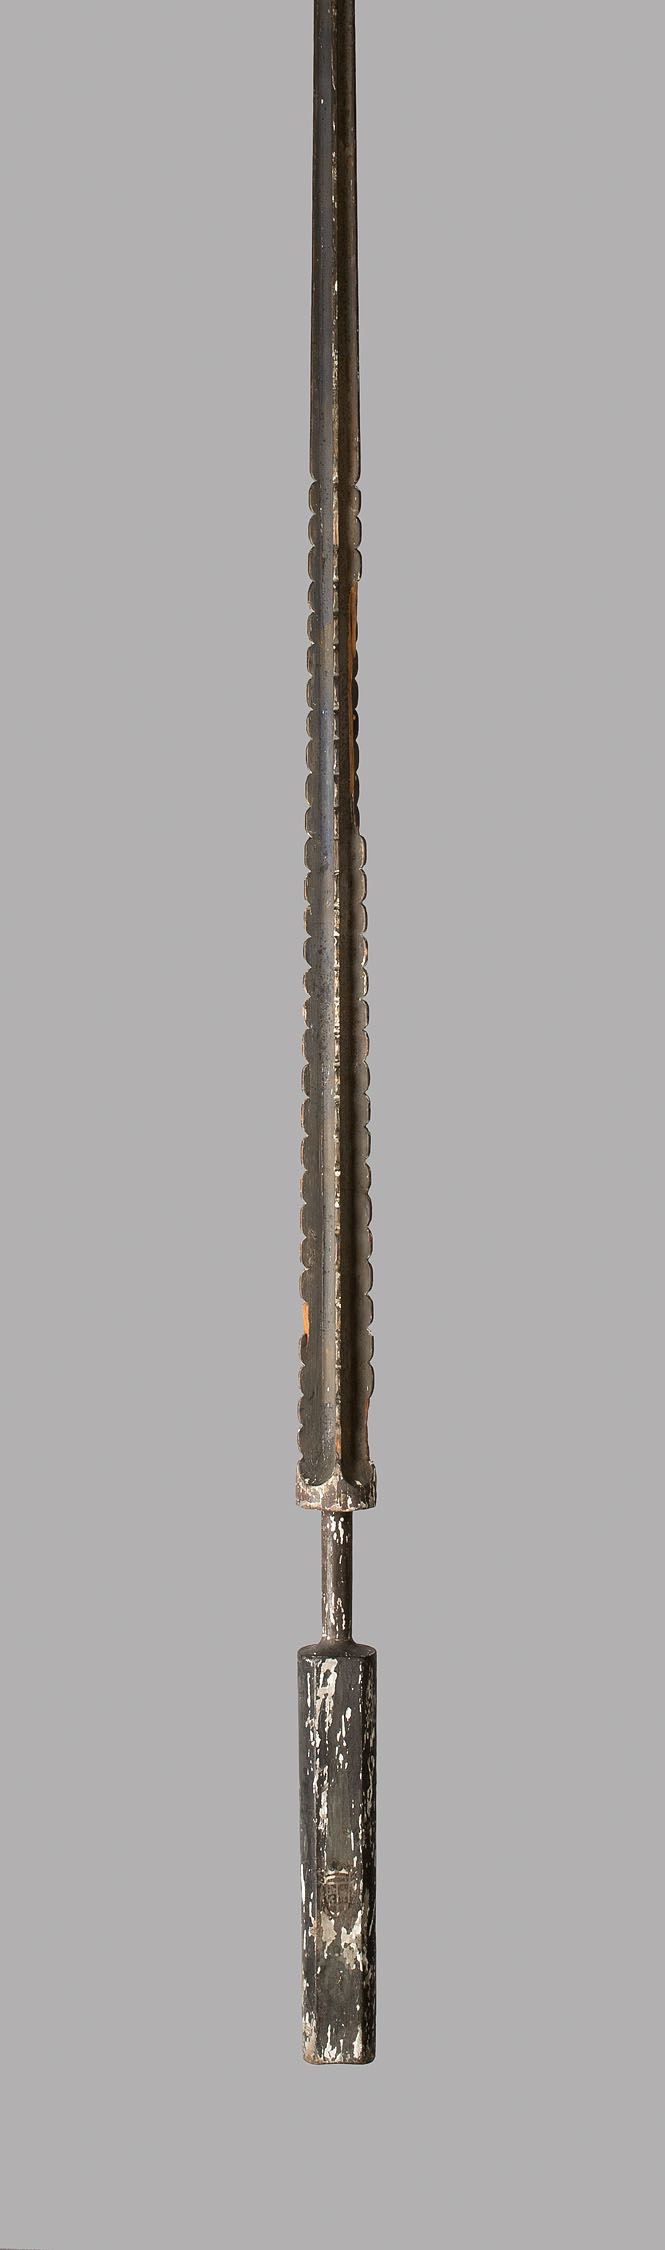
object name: Arms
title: Lance for Joust or Quintain Course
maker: German, Dresden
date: 1710-20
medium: Iron, wood, and paint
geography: Dresden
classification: edged weapon-staff; arms; arms and armor